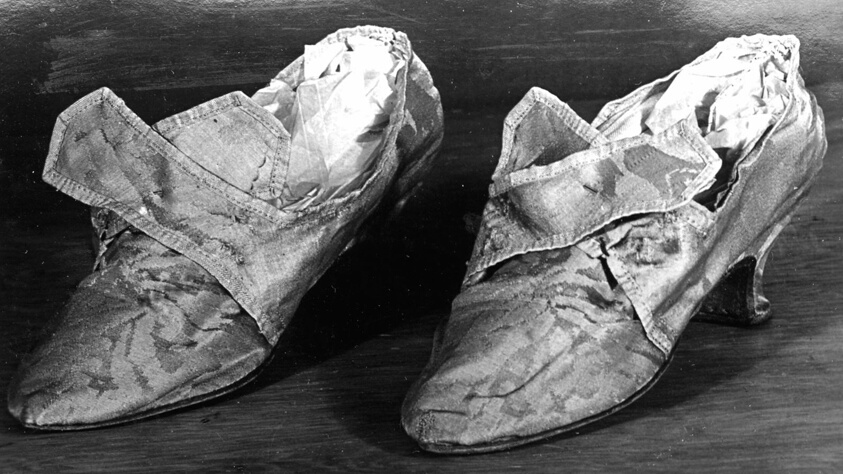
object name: Costume and Accessories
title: Woman's Shoes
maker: England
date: c.1770s/80s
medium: Pale blue damask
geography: England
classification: textile; shoes - misc; costume accessory - shoe; costume; dress (garment); clothing